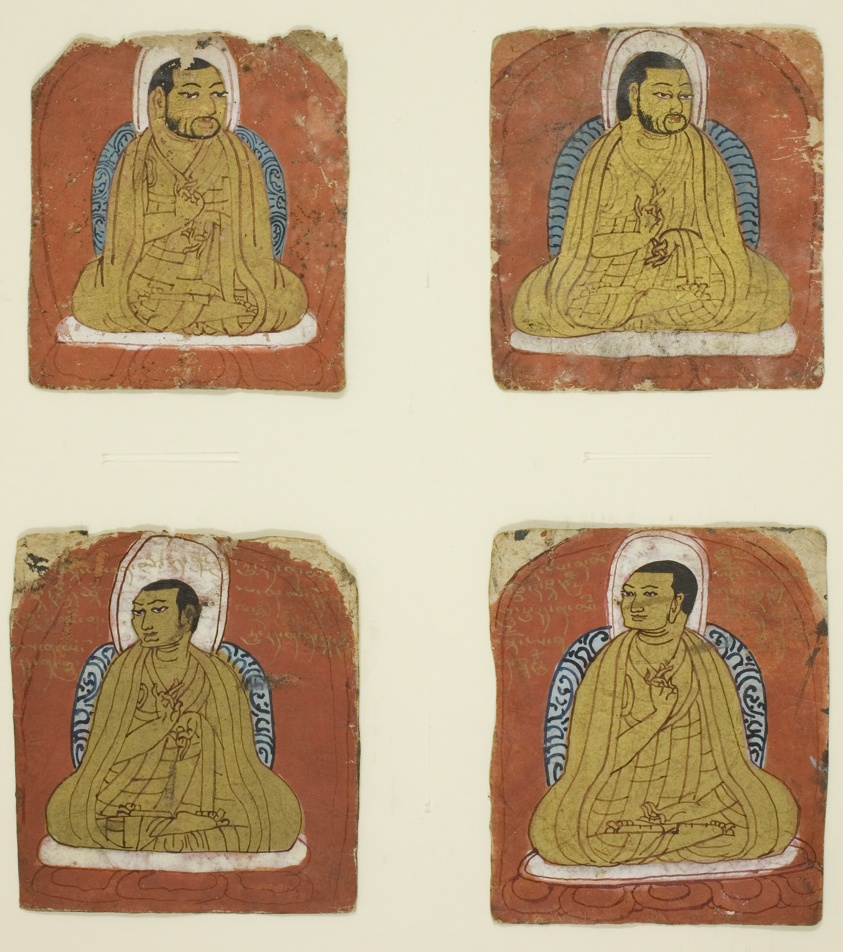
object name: Religious/Ritual Object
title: Four Miniature inscribed portraits of four Lamas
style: Himalayan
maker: Tibet; Central Tibet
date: 14th century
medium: Watercolor and gold on paper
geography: Central Tibet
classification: paper; watercolor; ritual objects